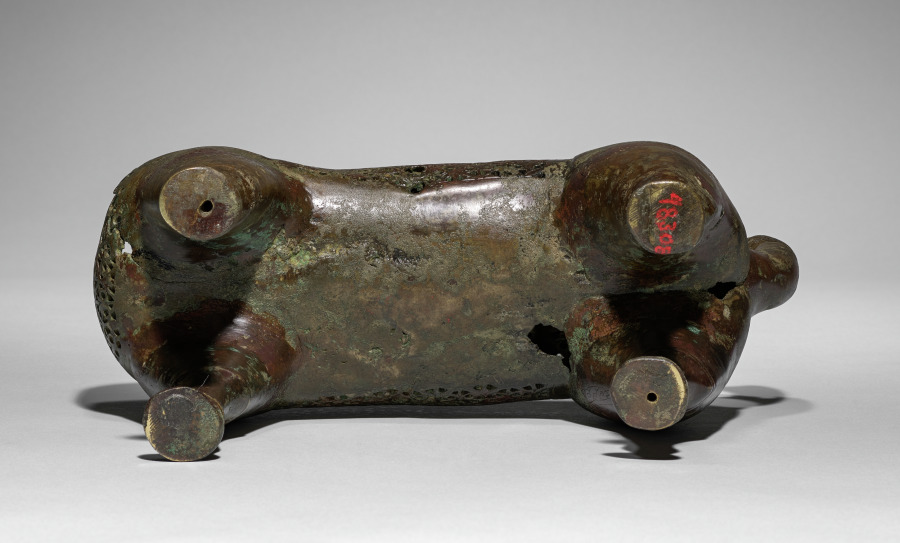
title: Feline Incense Burner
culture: Iran, Khurasan, Seljuq period of Iran (1037–1194)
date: 1150–1200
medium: Copper alloy, cast, engraved, chased, and pierced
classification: Metalwork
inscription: Qur'an sura al-jum'ah (The Friday Congregation) 62:9-10 (on neck and spine)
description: In Iran during the 1000s and 1100s, vessels in the shape of animals gained popularity, especially as incense burners. Felines were favored in Persian art and this piece may represent a caracal, a type of lynx. The head of the creature was cast separately and is removable to fill its body with hot coals and incense. Qur’anic verses on the neck and spine remind worshippers to set work aside, attend prayer, and then disperse to seek God’s bounty. The diffusion of perfumed smoke through the burner’s pierced palmette design may have served as a sensorial reminder of this teaching.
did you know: A Kufic inscription against a background of scrolling arabesques runs along the back and neck of the feline form.